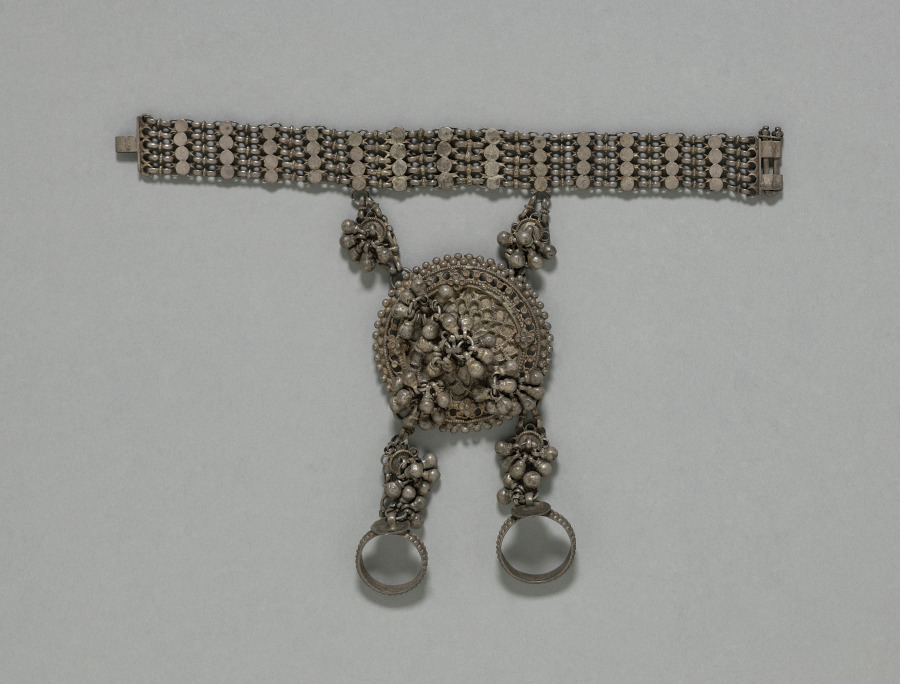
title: Rings and Bracelet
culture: India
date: 1800s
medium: silver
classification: Jewelry